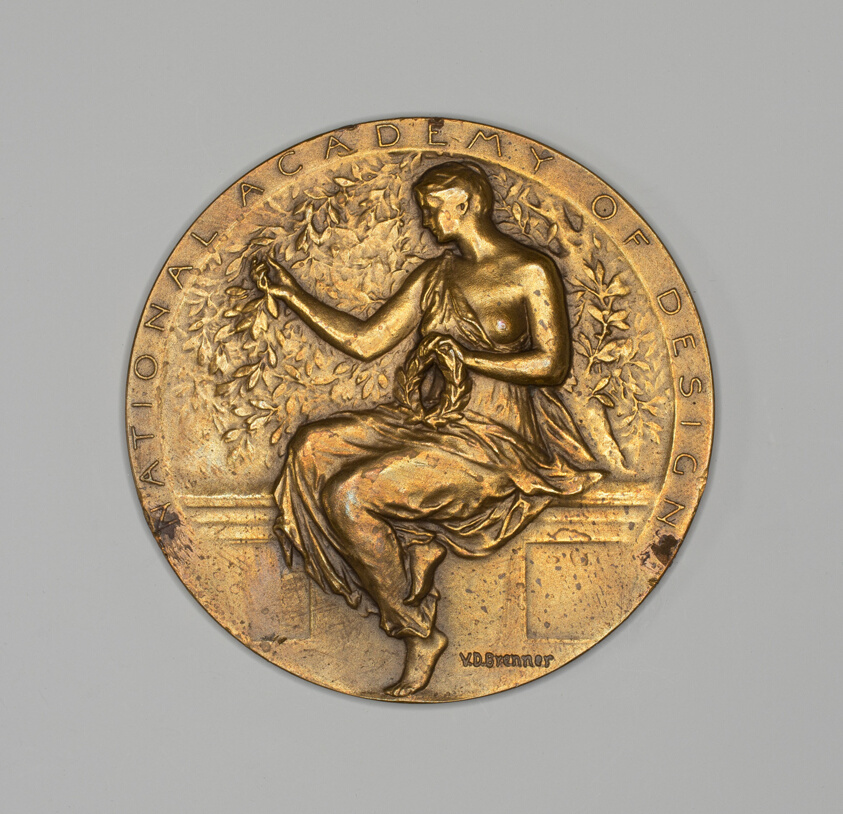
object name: Metalwork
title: National Academy of Design Medal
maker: Victor David Brenner (American, born Šiauliai, Russian Empire, now Lithuania, 1871–1924)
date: 1891–1908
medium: Bronze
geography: United States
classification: medal; american arts; decorative arts